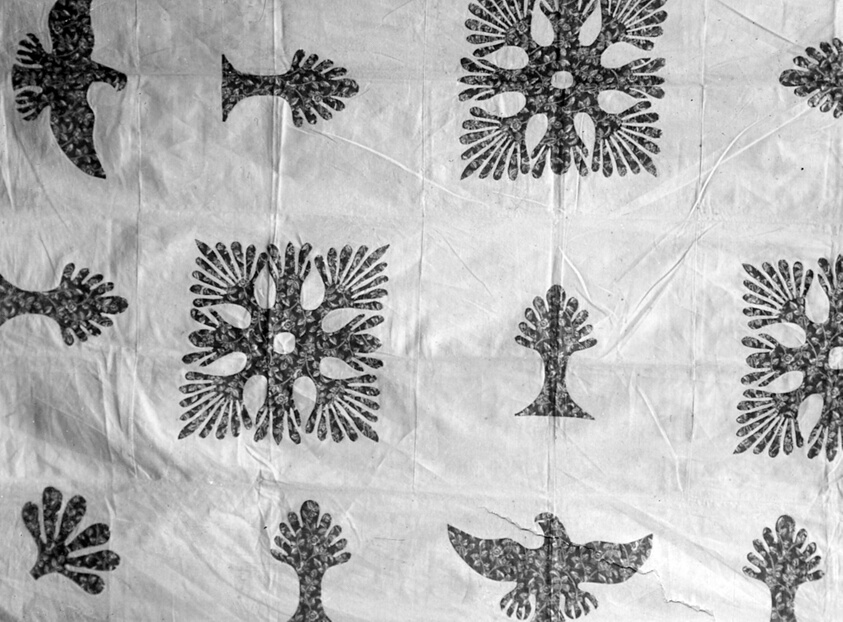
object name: Textile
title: Bedcover (Charter Oak Quilt)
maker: United States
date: c.1835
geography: United States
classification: textile; needlework - quilt